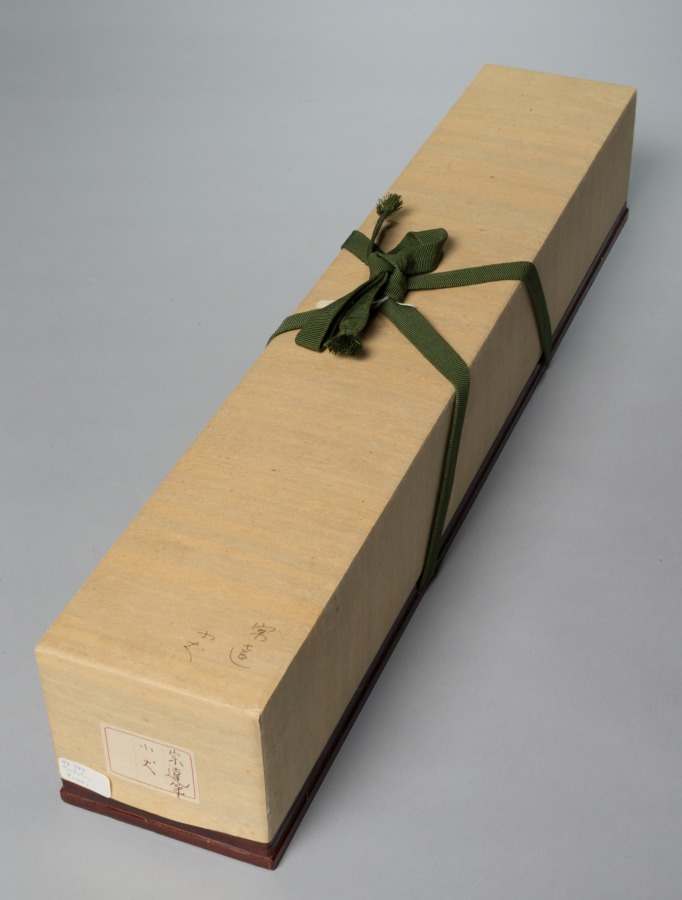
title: Puppy with Dandelions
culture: Japan, Edo period (1615–1868)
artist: studio of Tawaraya Sōtatsu (Japanese, c. 1570–c. 1640)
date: 1600–1640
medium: hanging scroll; ink on paper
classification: Painting